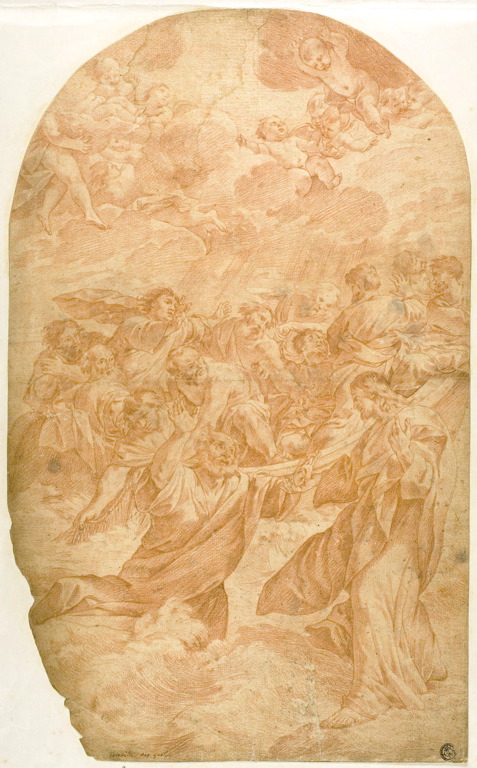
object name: Drawing and Watercolor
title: Christ Summoning Saint Peter to Walk on the Water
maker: After Giovanni Lanfranco; Italian, 1582-1647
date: after 1627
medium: Red chalk, over stylus underdrawing, on cream laid paper, laid down on cream laid paper, laid down on ivory wove paper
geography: Italy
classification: chalk; drawings (visual works); prints and drawing